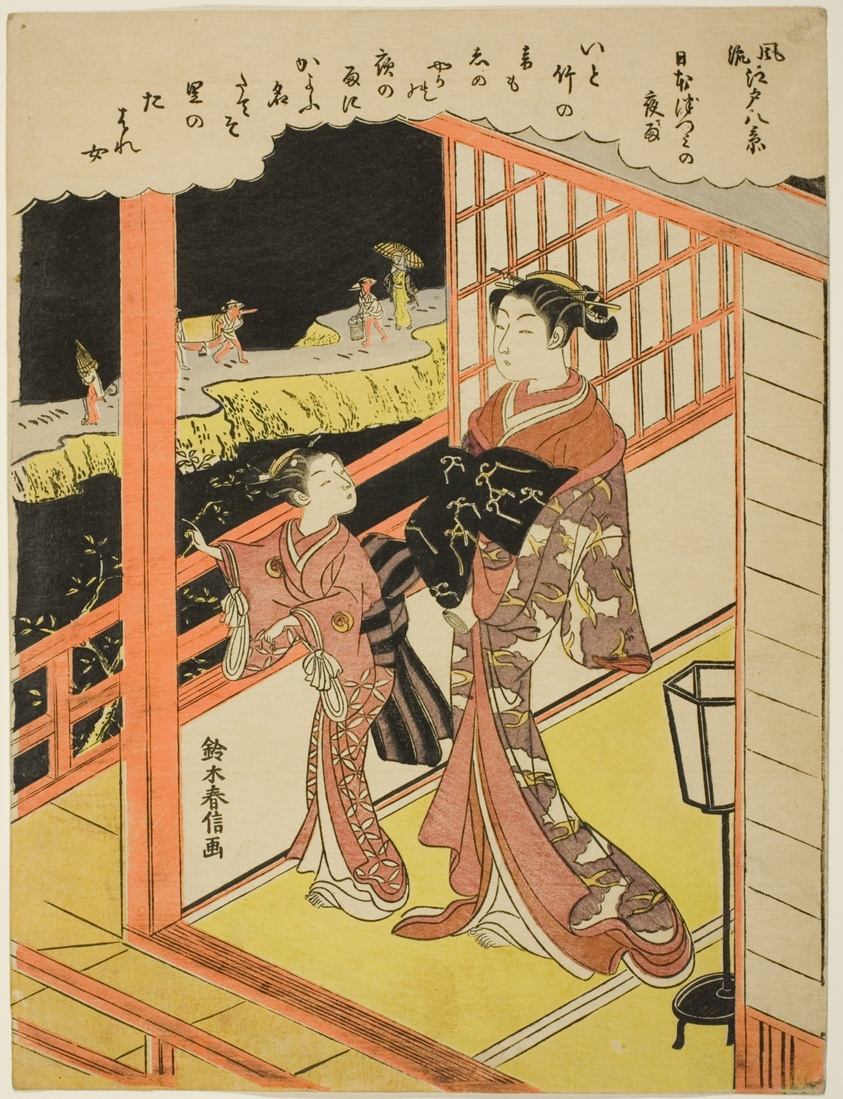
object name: Print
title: Evening Rain at Nihonzutsumi (Nihonzutsumi no yau), from the series "Eight Fashionable Views of Edo (Furyu Edo hakkei)"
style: Japanese (culture or style)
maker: Suzuki Harunobu 鈴木 春信; Japanese, 1725 (?)-1770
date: c. 1768/69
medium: Color woodblock print; chuban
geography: Japan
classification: woodblock print; print; asian art